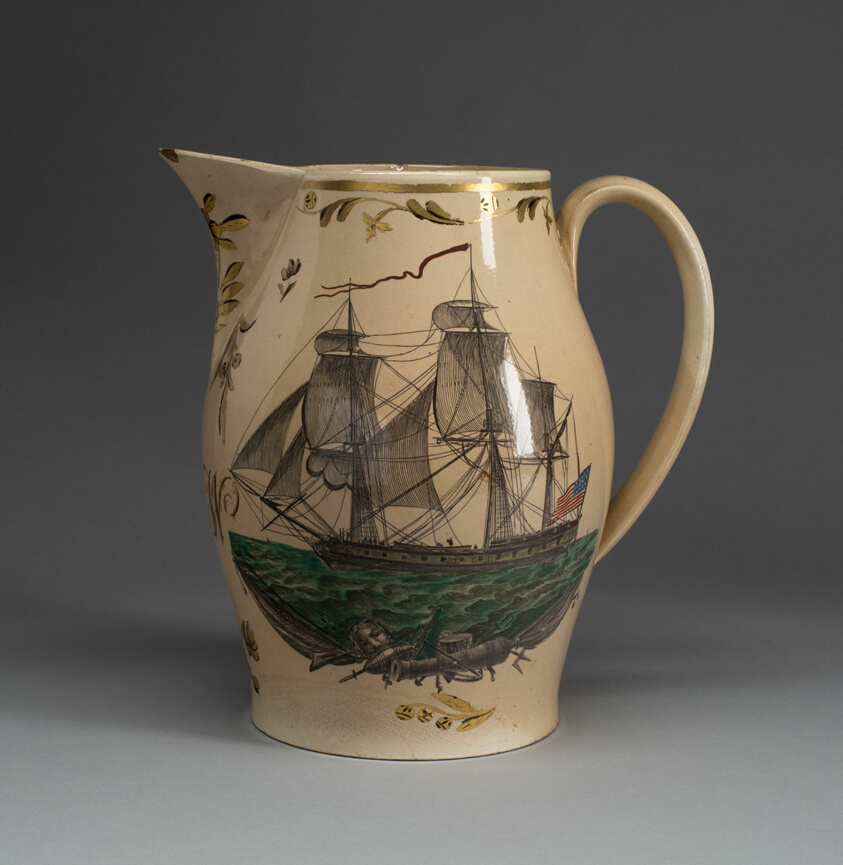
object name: Decorative Arts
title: Jug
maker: English for the American market; Liverpool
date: c. 1795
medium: Earthenware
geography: Liverpool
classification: vessel; american decorative arts; european decorative arts; ceramics; decorative arts